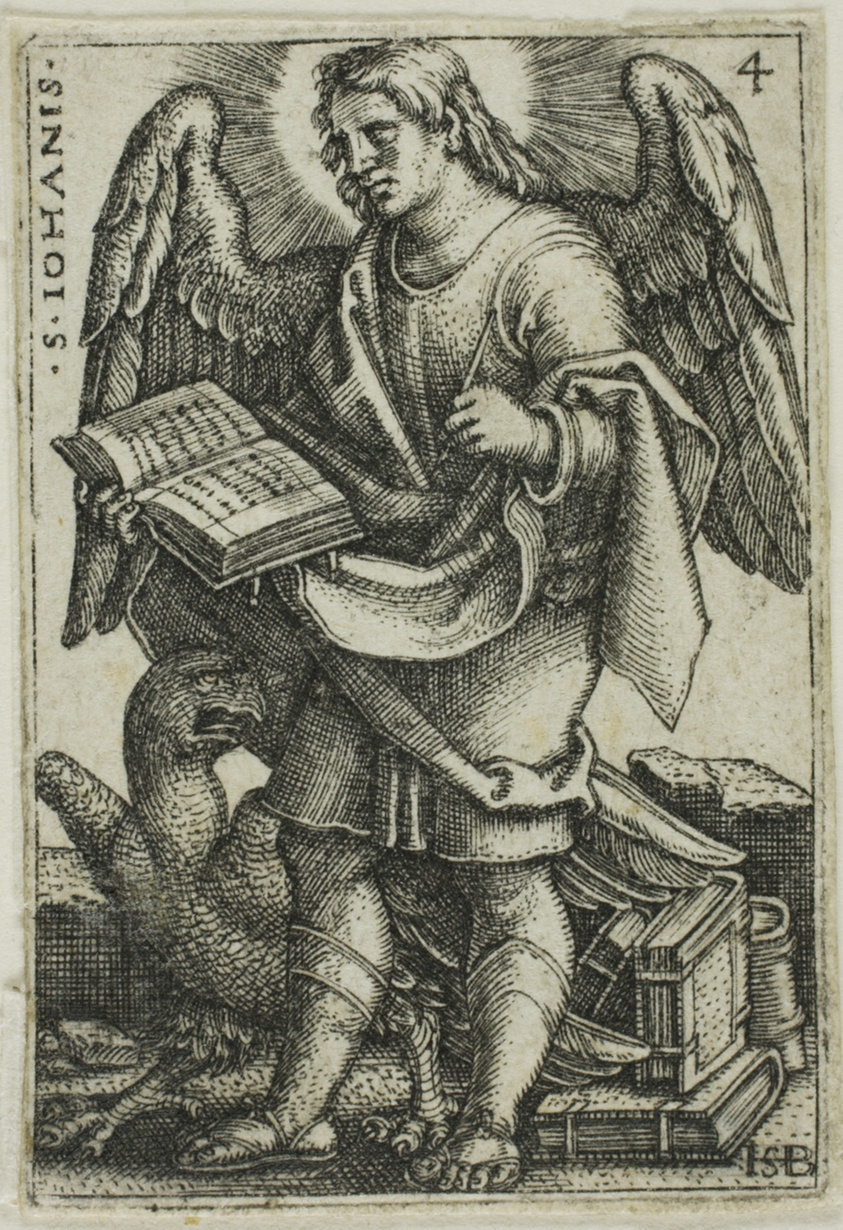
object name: Print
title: St. John, from The Four Evangelists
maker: Sebald Beham; German, 1500-1550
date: 1541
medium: Engraving in black on ivory laid paper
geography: Germany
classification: engraving; print; prints and drawing